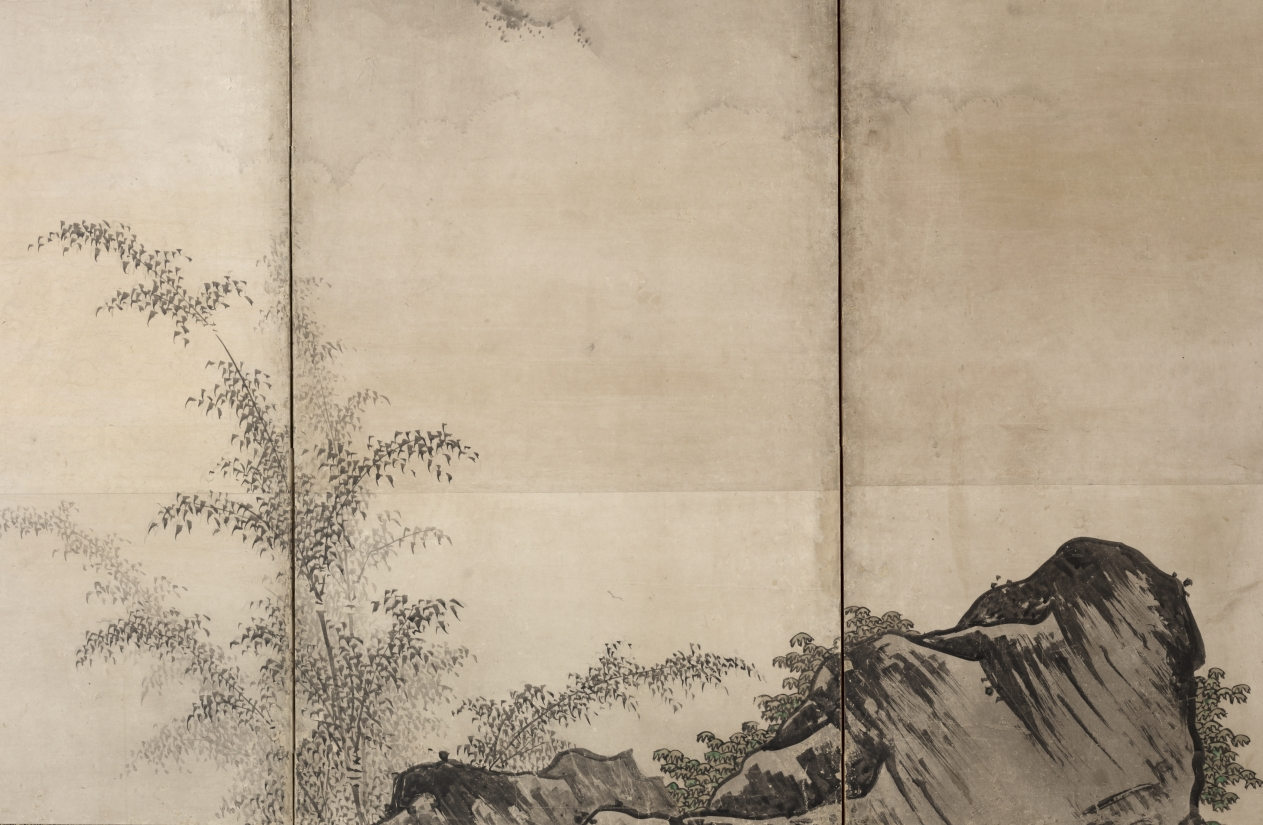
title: Pan Lang (Han Rō)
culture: Japan, Momoyama period (1573–1615)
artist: Unkoku Tōgan (Japanese, 1547–1618)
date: early 1600s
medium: one of a pair of six-panel folding screens; ink, light color, and gold on paper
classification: Painting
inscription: Each screen in the pair is impressed with two seals arranged vertically, a round "Unkoku" seal above and square "Togan" seal below.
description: This is one of the pair of screens depicts episodes from the stories of famed Song-dynasty poets Su Shi of the 1000s and Zhou-dynasty official Pan Lang of the 900s. Both men were banished by their rulers for their perceived missteps. Su Shi’s comments on a series of economic reforms were seen as criticism of the emperor. Pan Lang composed an ill-advised verse about one of the king’s horses. In this screen Pan rides backward on his donkey as he returns from exile so that he may have a last look at his now beloved Mount Hua. Su Shi, on the other screen, is shown embarking on his journey into exile. The artist of these screens, Unkoku Tōgan, was the founder of the Unkoku school of painting, which emulated the style of renowned ink painter Sesshū Tōyō (1420–1506). Tōgan was the official painter of the Mori family of what is now Yamaguchi prefecture in the south of Japan.